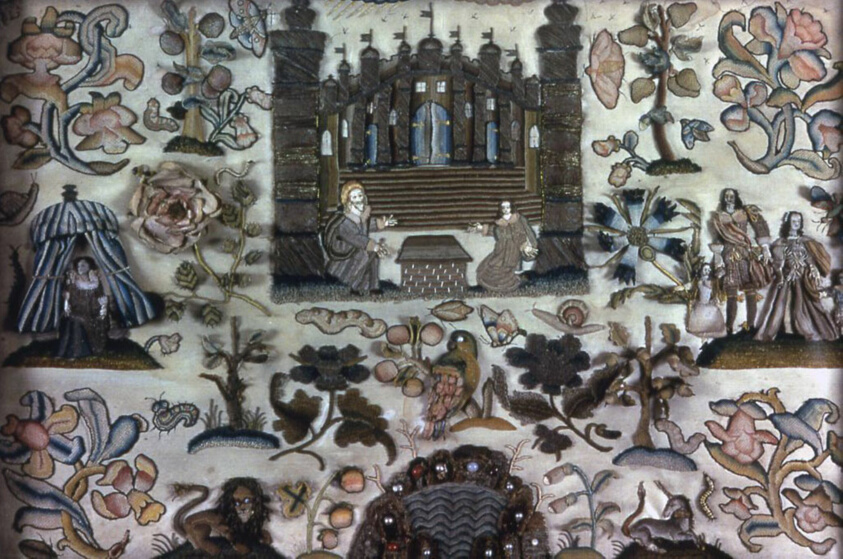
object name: Textile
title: Picture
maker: England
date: 1660/65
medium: Silk, weft-float faced 7:1 satin weave; appliquéd with linen, plain weaves and silk, satin weaves; embroidered with silk, linen, gilt-metal-strip-wrapped silk, feathers, metal wire and purl in bullion, eyelet, Roman, satin, split, stem, and tent stitches; raised work in a variety of buttonhole, raised stem, and trellis stitches with bullion picots; couching and embroidered cut pile; embellished with beads, mica and pearls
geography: England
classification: textile; needlework (visual works)